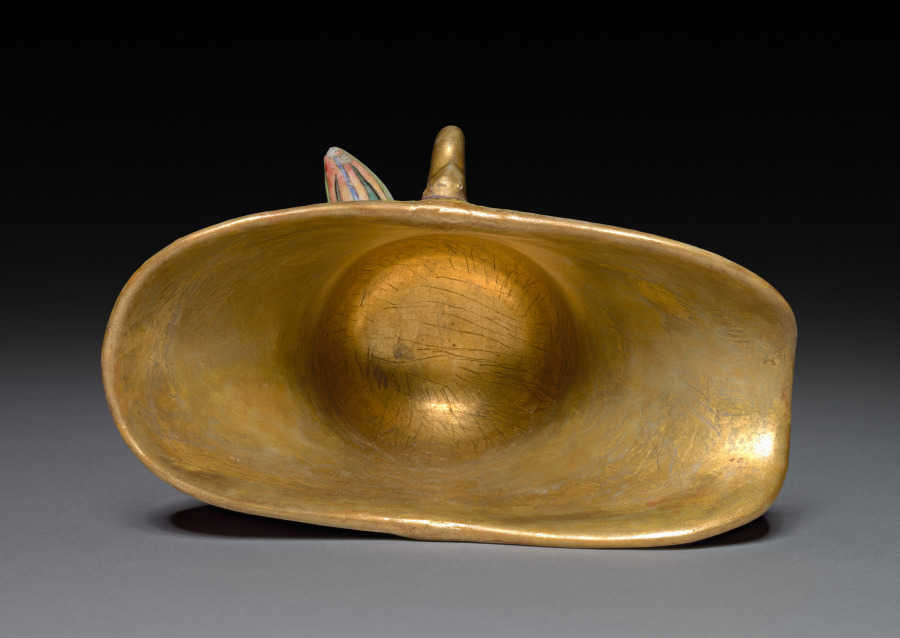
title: Libation Cup of Bronze Format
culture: China, Qing dynasty (1644-1911)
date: 1800s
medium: porcelain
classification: Ceramic